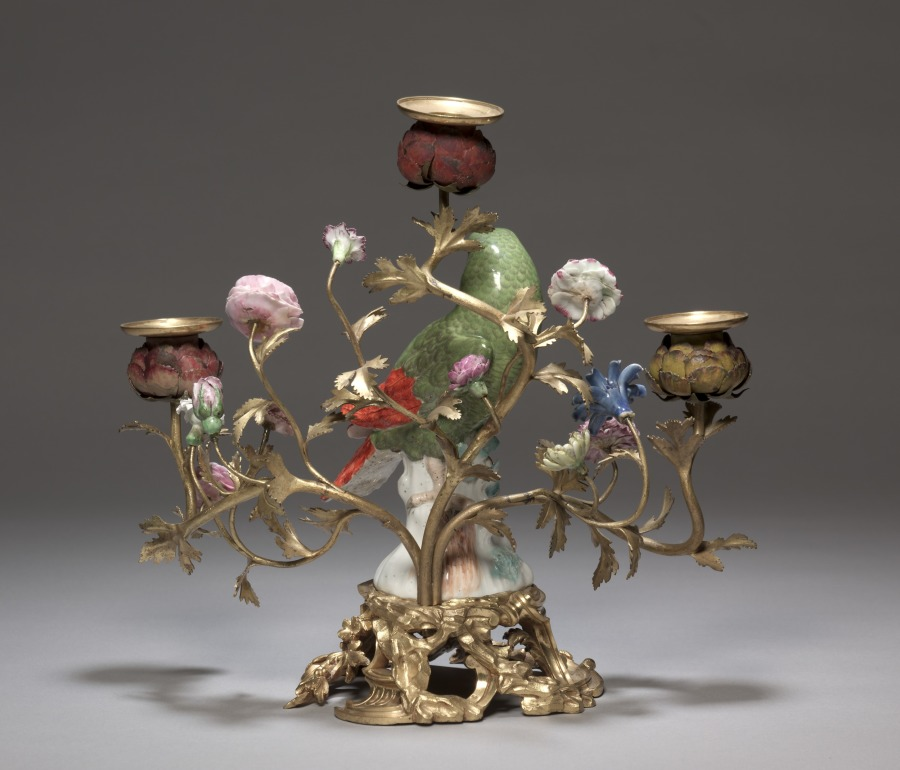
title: Candelabrum with Parrot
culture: Germany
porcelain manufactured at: Meissen Porcelain Factory (German, est. c. 1710)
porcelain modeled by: Johann Joachim Kändler (German, 1706–1768)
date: c. 1740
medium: porcelain mounted in gilt bronze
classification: Ceramic